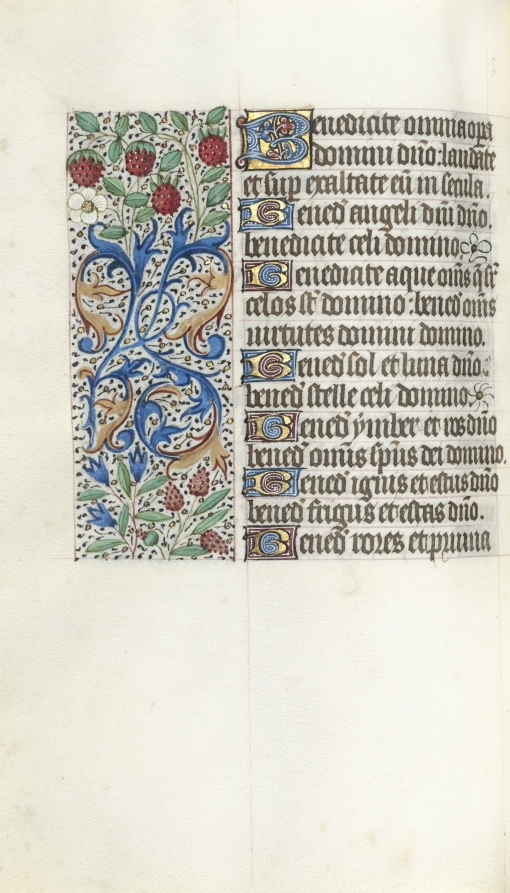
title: Book of Hours (Use of Rouen): fol. 42v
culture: France, Rouen, 15th century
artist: Master of the Geneva Latini (French, active Rouen, 1460–80)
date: c. 1470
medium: ink, tempera, and gold on vellum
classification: Bound Volume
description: In the late 1400s and early 1500s Rouen was an established and important center of book production. The city’s cathedral had a wealthy chapter that spent large sums of money to commission books and to maintain its extensive library. The stationers and booksellers would have likely been concentrated in or near the cathedral precinct. This artist, named after a manuscript now in Geneva, was Rouen’s principal illuminator during the second half of the 1400s.